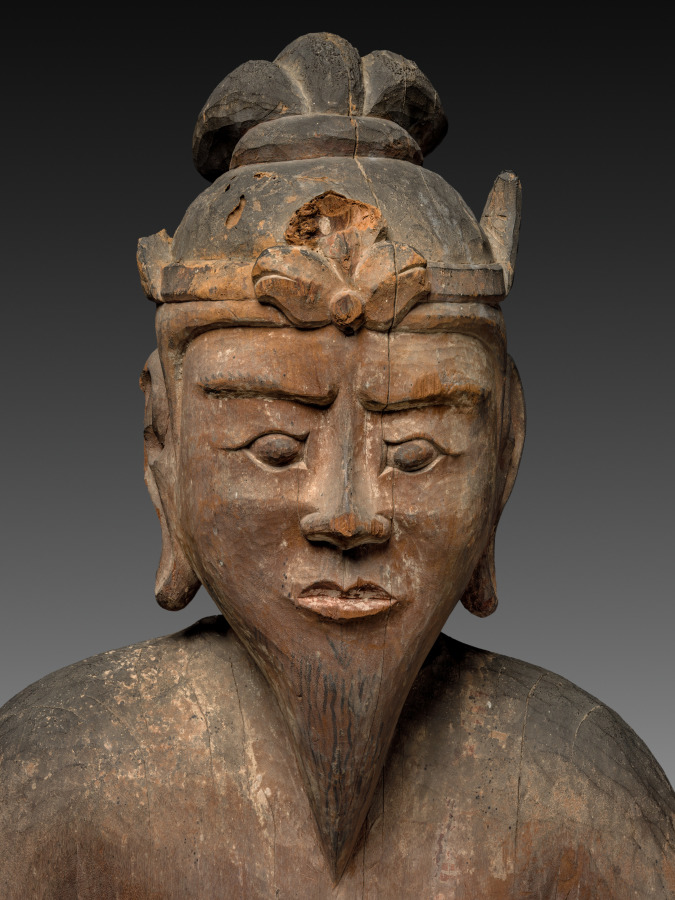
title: Deity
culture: Japan, Heian period (794–1185)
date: 1100s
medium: Magnolia wood with traces of color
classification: Sculpture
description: This unidentified sculpture represents a mature male figure with a long beard. His robes, crown-like head ornament, and hair arranged into a topknot resemble the attire and styling of members of the heavenly realm—tenbu in Japanese—of the Buddhist cosmos. The comparatively simple design, along with carving marks purposely left by the sculptor throughout the surface tend to be associated with sculptures of kami, deities venerated at shrines, or jinja.